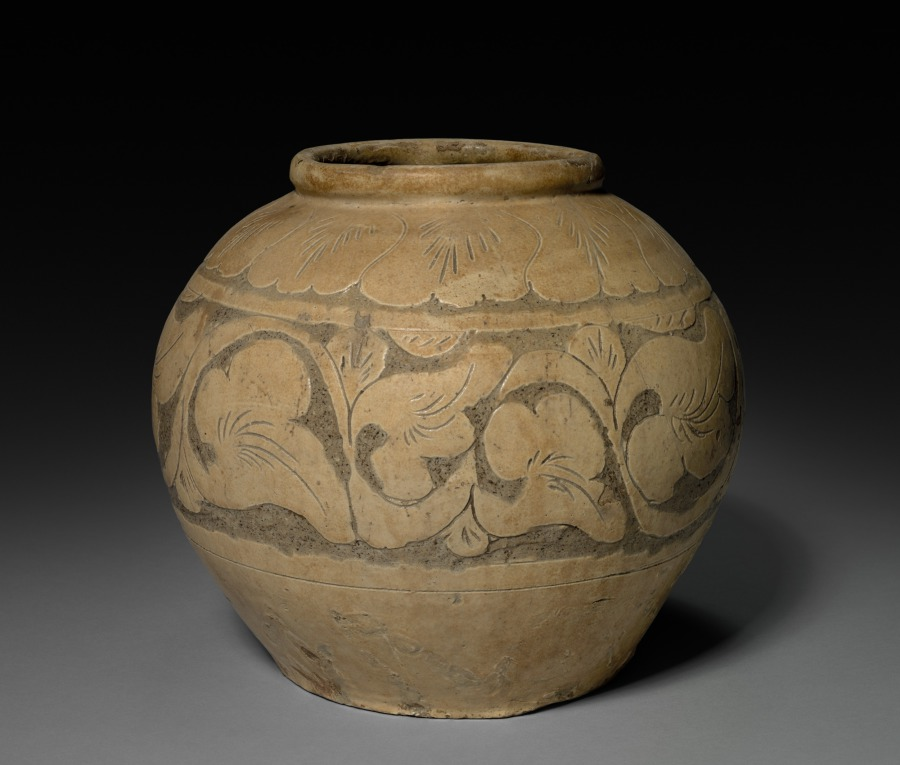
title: Jar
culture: China, Manchuria, Liao dynasty (916-1125)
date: 907–1125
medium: Glazed stoneware, Cizhou ware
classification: Ceramic